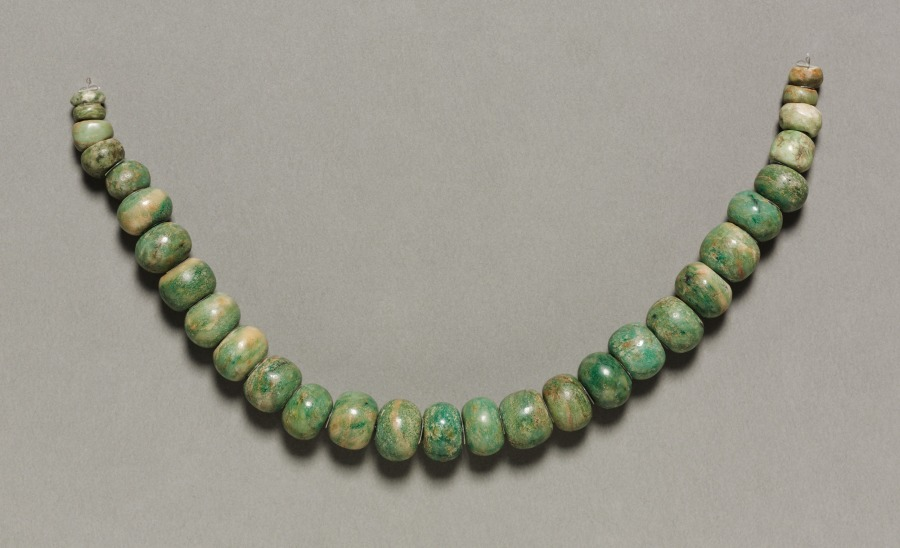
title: Necklace and Nose Ornament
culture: Central Mexico, Teotihuacán, Classic period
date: 150–200 CE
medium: jadeite-albitite?, gold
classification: Jewelry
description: Near Teotihuacán’s largest palace is a temple ornamented with green-feathered serpents, symbols of the earth’s fertility. Beneath the temple were at least 120 human sacrifices, most men, many warriors, and some wearing greenstone ornaments like these, perhaps a set. The sacrifices may have consecrated the temple or a ruler’s tomb, or both.